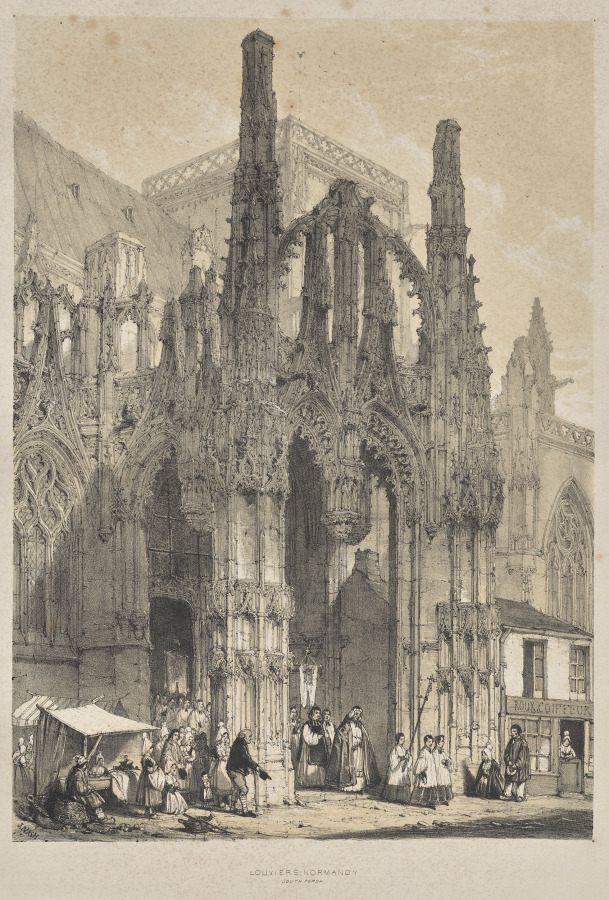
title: Architecture of the Middle Ages: Louviers, Normandy, South Porch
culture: England, 19th century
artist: Joseph Nash (British, 1808–1878)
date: 1838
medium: lithograph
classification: Print